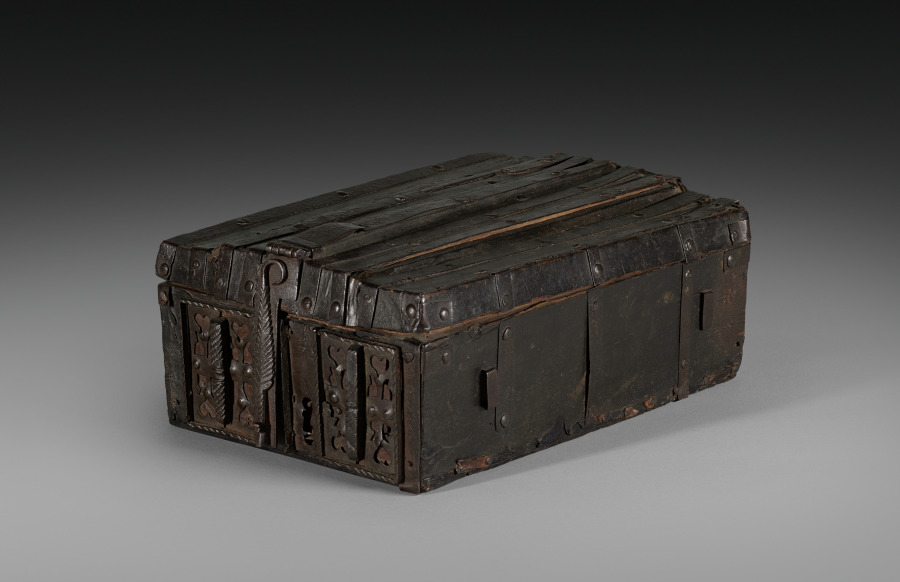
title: Coffret with Woodcut of Saint Veronica's Vernicle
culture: Coffret: France, probably Paris; Woodcut: Germany, Augsburg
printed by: Hans Burgkmair the Elder (German, 1473–1531)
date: Coffret: c. 1515; Woodcut: c. 1509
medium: Wood, leather, iron, textile, woodcut with stenciled coloring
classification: Print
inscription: SALVE. XPI. EFFIGIES. SACERRI[M]A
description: This remarkable object is thought to have functioned as a traveling case to keep small valuables and books, as well as a provisional altar. Made in France around 1515, the interior lid is affixed with a devotional woodcut made in Germany, imported, and colored for the purpose. Featuring an image of the veil of Saint Veronica, the text at the bottom of the woodcut guides the user in prayer to the holy image of Christ’s face which has been miraculously imprinted on the veil, an action that held promise of indulgences (a reduction in one’s punishment for sins). Presumably, the owner carried the box on a journey, retrieved a prayer book from inside, and propped it open in order to practice daily prayers.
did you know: A secret compartment on the top lid of this coffer may have held a relic, consecrated host, or valuable document.